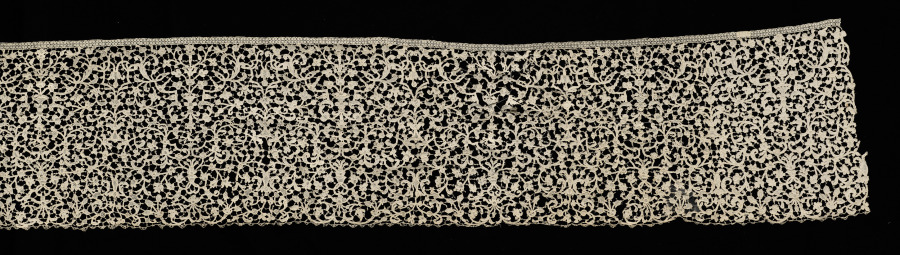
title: Lace Flounce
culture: Italy, Venice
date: 1660–99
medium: Needle lace (Venetian Rose Point-Punto Rosallino)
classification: Lace